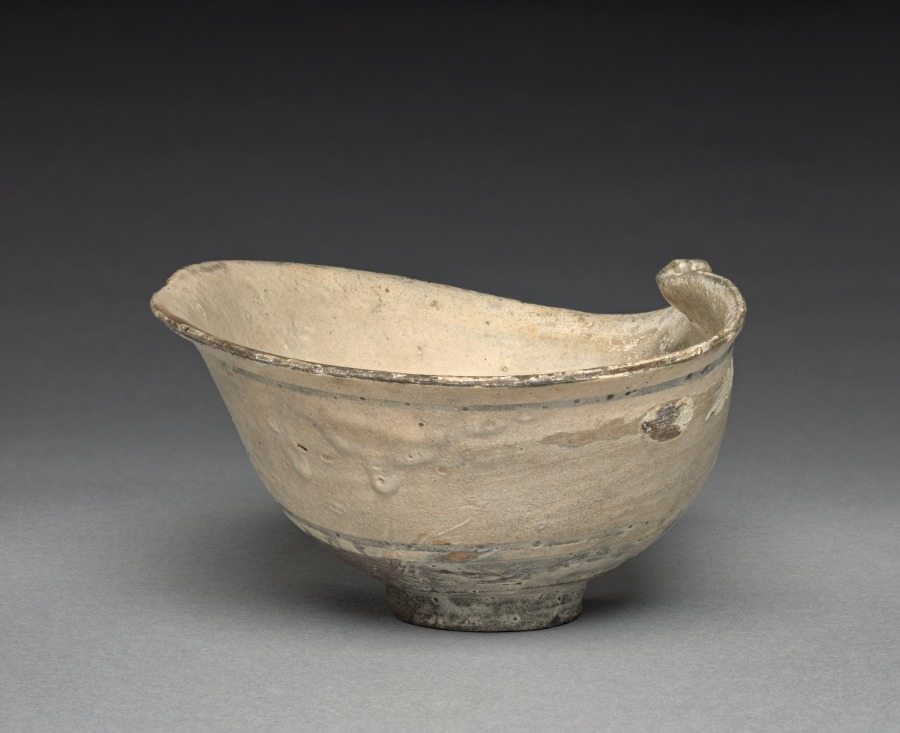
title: Bowl with Brushing Decorations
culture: Korea, Joseon dynasty (1392–1910)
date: 1400s–1500s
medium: Clay, glaze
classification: Ceramic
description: This type of wide-mouthed bowl was used everyday in Korea, not exclusively for tea drinking. But when it was introduced to Japan around the early 1500s, its imperfect appearance evoking the aesthetics of wabi-sabi caused it to be repurposed as a tea bowl. Korean tea bowls were circulated as an item of foreign luxury among Japanese military elites. Many Korean potters were abducted to Japan during the Japanese invasions (1592–98) and some settled down in provinces such as in the Saga prefecture in Kyushu. Dislocated Korean potters are often credited for their leading role in the development of ceramic industry in Japan.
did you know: This type of humble tea bowl was highly praised among Japanese collectors for its imperfect beauty.